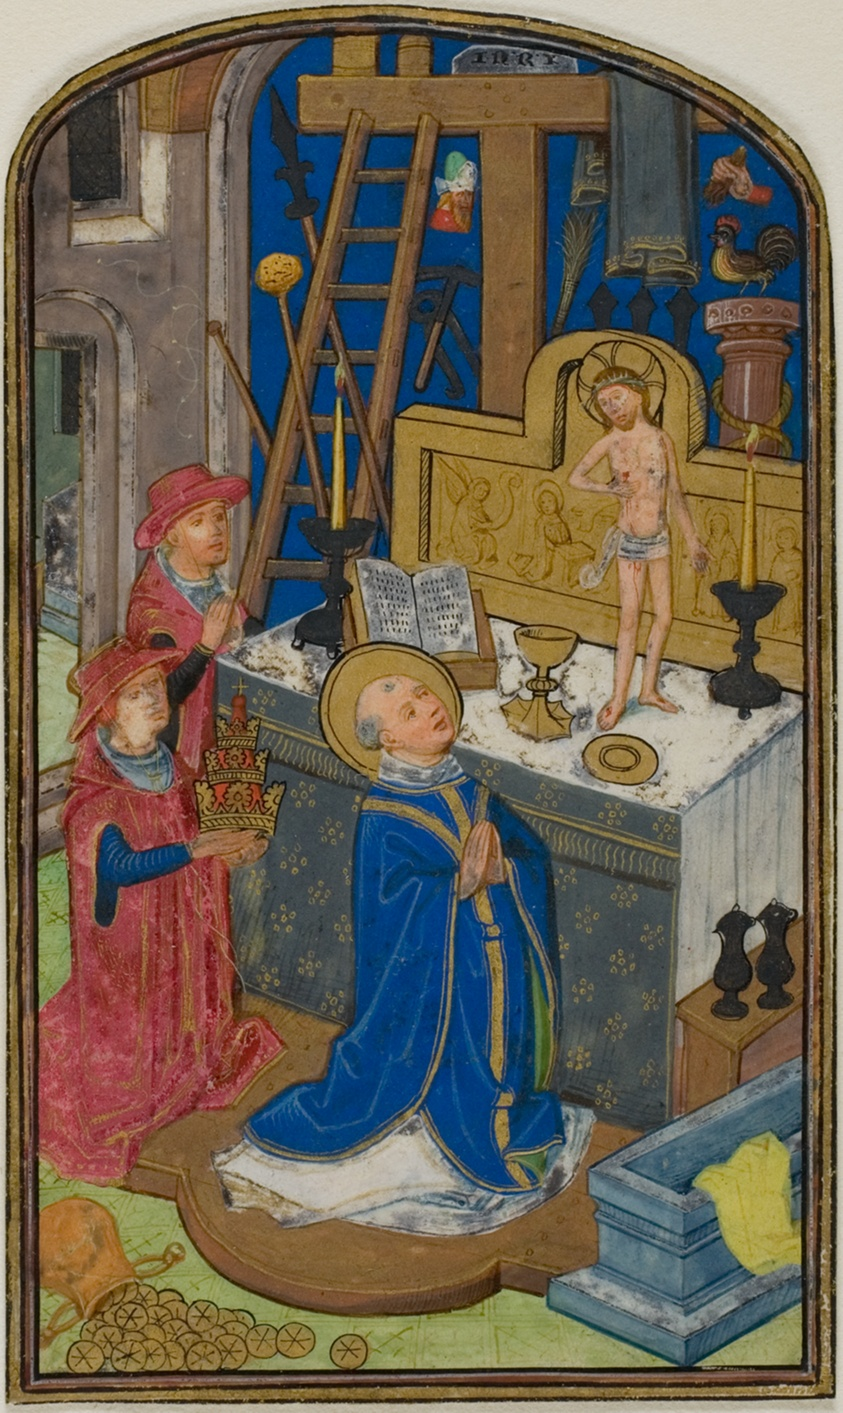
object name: Drawing and Watercolor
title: The Mass of St. Gregory, from a Book of Hours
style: medieval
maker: Willem Vrelant or his workshop (Bruges); Netherlandish, flourished 1449-1481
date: 1460/70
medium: Manuscript cutting in tempera and liquid gold on parchment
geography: Netherlands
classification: tempera; manuscript; drawings (visual works); prints and drawing